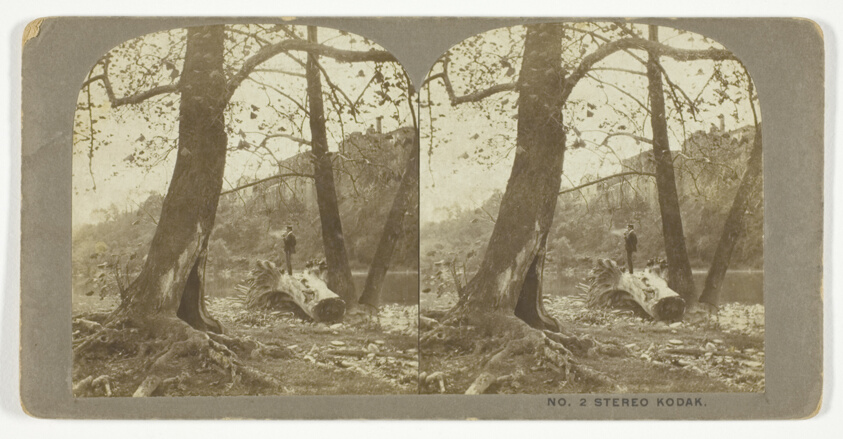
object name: Photograph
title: Stereo Kodak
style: 19th century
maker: London Stereoscopic Company; English, 1854 - 1922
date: Late 19th century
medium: Albumen print, stereo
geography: London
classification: photography; photograph; albumen silver print; stereograph (albumen)